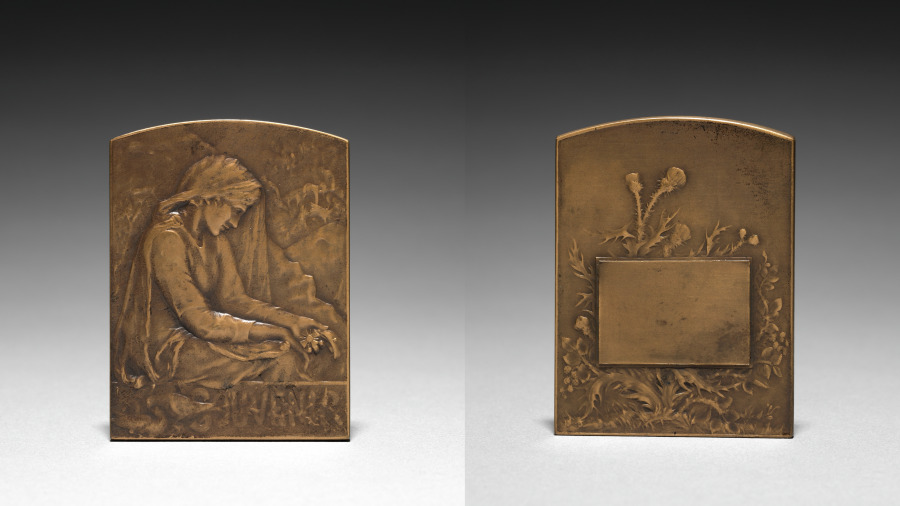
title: Medallion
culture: France, 19th century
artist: Marie Alexandre Lucien Coudray (French, 1864–1932)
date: 1900s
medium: bronze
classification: Metalwork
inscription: "SOUVENIR"; signed: "L. Coudray."